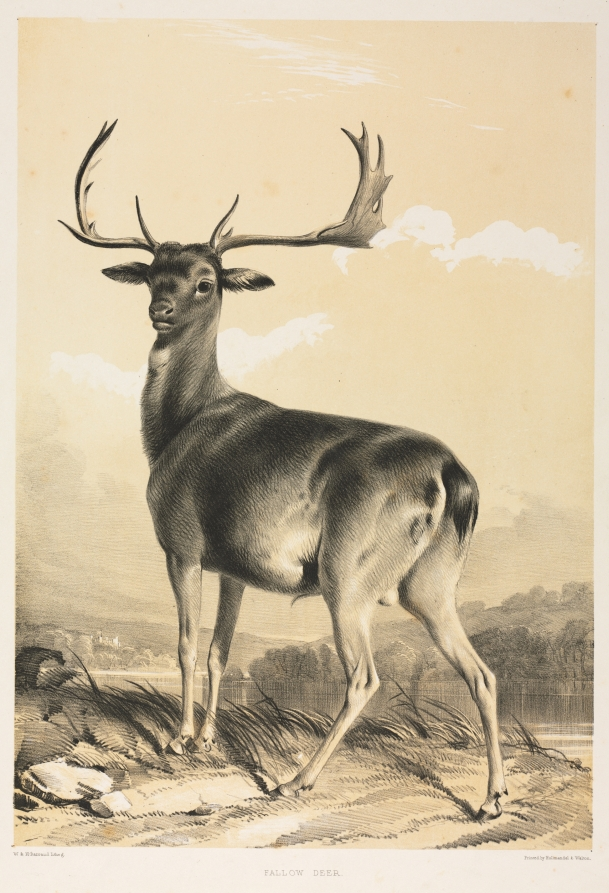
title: Fallow Deer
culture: England, 19th century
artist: William Barraud (British, 1810–1850)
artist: and Henry Barraud (British, 1811–1874)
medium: lithograph with black and beige tint stone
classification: Print